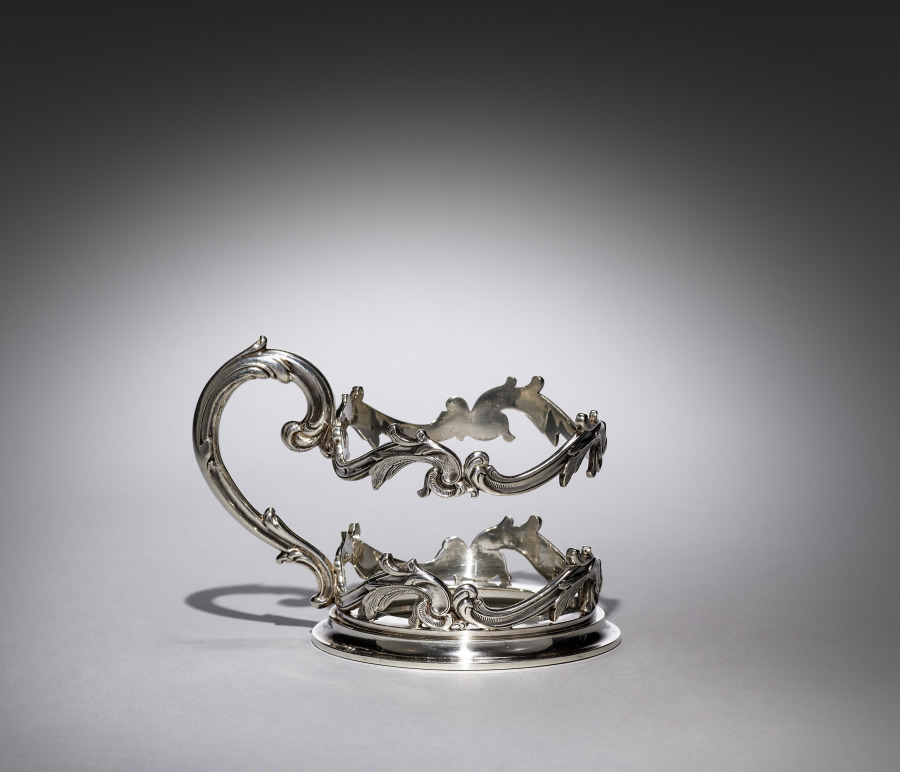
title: Tea Cup Holder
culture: Russian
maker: House of Fabergé (Russian, 1842–1918)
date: c. 1908–1917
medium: silver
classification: Glass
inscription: Greek letter delta (or alpha); profile of a woman (wearing a kokoshka) facing right; "88"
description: This holder and its glass are likely from a larger set. It is an excellent example of Fabergé’s ability to imbue objects of everyday use with exceptional artistry. The holder features elegant scroll motifs forming two horizontal bands and a handle, an ingenious take on the French ornamental style of the mid-eighteenth century.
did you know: In Russia, tea has been served in glasses since the eighteenth century.